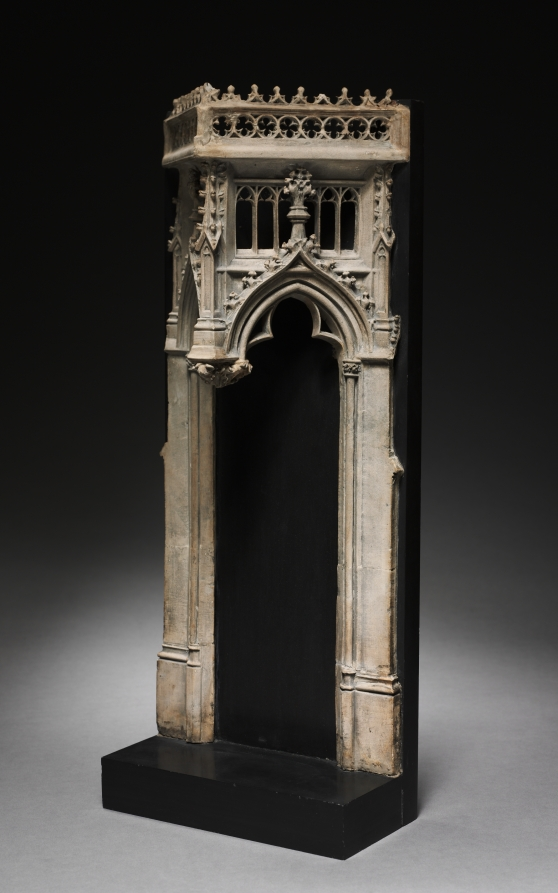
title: Architectural Canopy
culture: France, Burgundy, 15th century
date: c. 1450–1475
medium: limestone from Tonnerre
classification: Sculpture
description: Part of a pair of canopies, both must have originally belonged to an architectural ensemble like a tomb or a choir screen set within a church. Strikingly carved as architecture in miniature, they contain all of the elements of Flamboyant Gothic architecture of the late 15th century, so named after its flame-like stone tracery with wavy ornaments. This style of architecture is characterized by its intricacy of detailing and virtuosity of workmanship. Small sculptures may have originally occupied the space beneath the canopies.